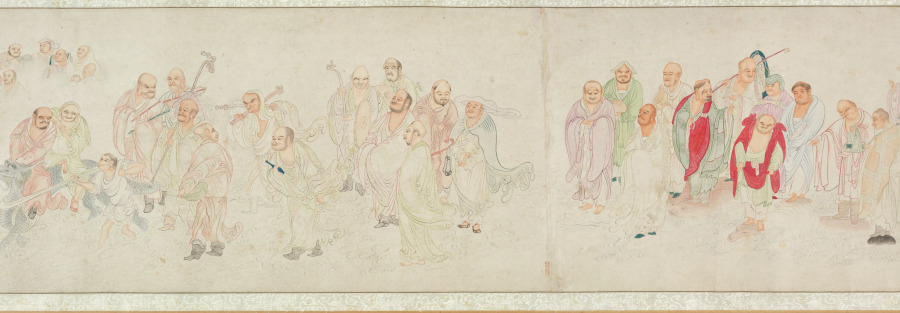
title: The Five Hundred Arhats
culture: China, Ming dynasty (1368–1644)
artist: Wu Bin (Chinese, active c. 1591–1626)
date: 1591–1626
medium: Handscroll; ink and color on paper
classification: Painting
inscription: 枝隱頭陀吳彬齋心拜寫 [印]吳彬之印; 文中父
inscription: 7 seals of Qianlong emperor (r. 1736–95): Gu xi tian zi 古希天子; Shou 壽; Qianlong jian shang 乾隆鑑賞; San xi tang jing jian xi 三希堂精鑑璽; Yi zi sun 宜子孫; Tai shang huang di zhi bao 太上皇帝之寳; Qian qing gong bao 乾清宮寶.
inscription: 6 seals of Cheng Qi 程琦 (1911–1988): Ke an geng zi wu shi yi hou suo de ming ji 可菴庚子五十以後所得名跡; 5 other Cheng Qi seals.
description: More than 66 feet long, this handscroll depicts 447 luohans, 72 attendants, and the bodhisattva of compassion at its very end. Luohans (arhats in Sanskrit), disciples of the Buddha and protectors of the Buddha’s law, possess supernatural powers and take on myriad external appearances. The amusing assortment of characters are engaged in an array of religious, secular, and miraculous activities. The painter used stylistic features borrowed from earlier artists, carefully controlled lines, and refined coloring. Wu Bin was a lay Buddhist and depicting this sort of image was part of a religious practice seeking understanding of the Buddha’s teaching.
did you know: Far advanced on the path to enlightenment, arhats have the capacity to tame tigers, free dragons, and to float on water or in the air.